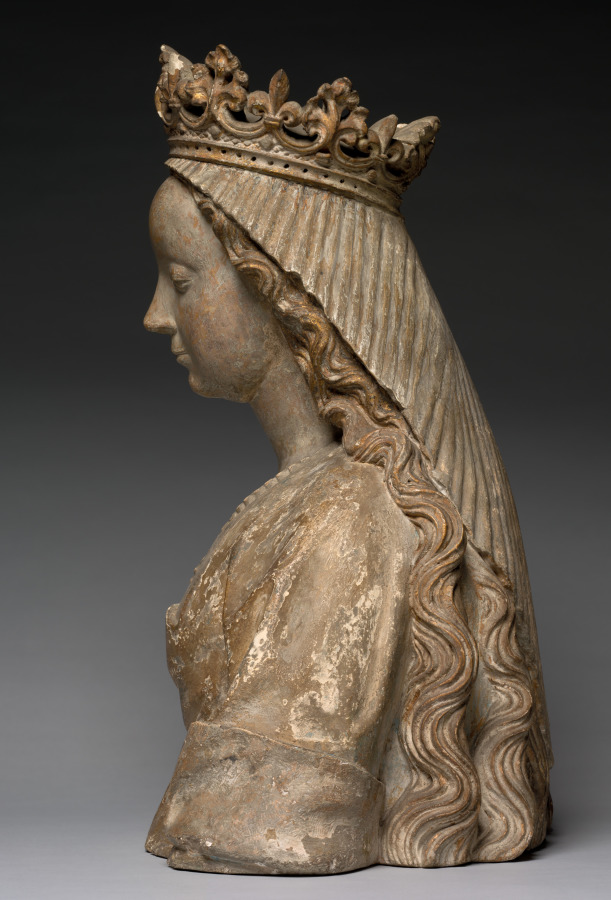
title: Bust called Anne de Bretagne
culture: France, 16th century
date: c. 1500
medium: stone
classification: Sculpture